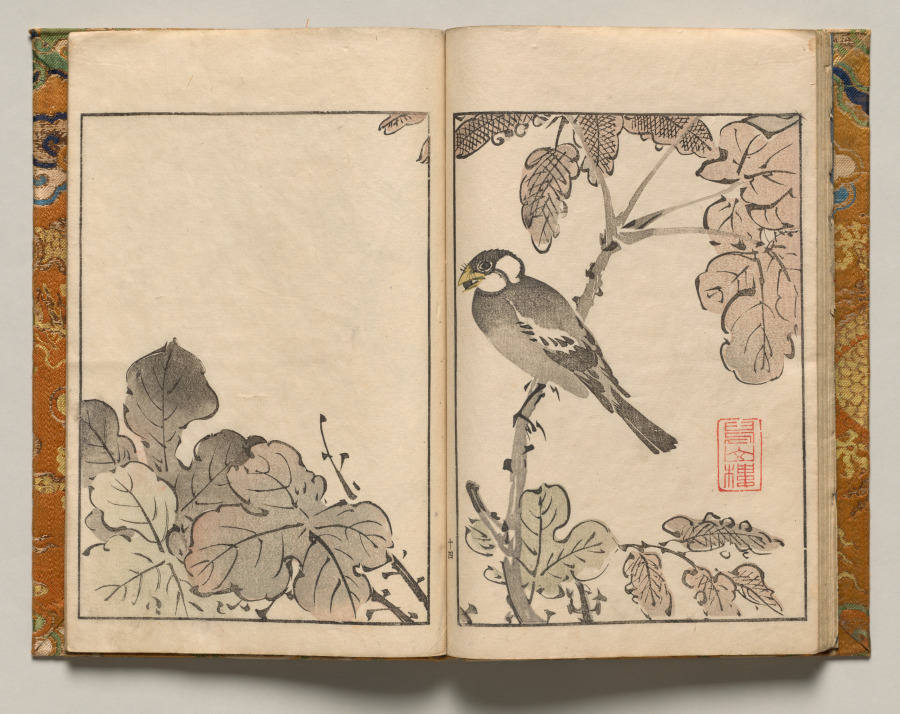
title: Bird on Bough, Design Fourteen from Shazanrō Picture Book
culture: Japan, Edo period (1615–1868)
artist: Tani Bunchō (Japanese, 1763–1841)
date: 1816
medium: woodblock-printed book; ink and color on paper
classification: Bound Volume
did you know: Shazanrō was one of Tani Bunchō's style names.